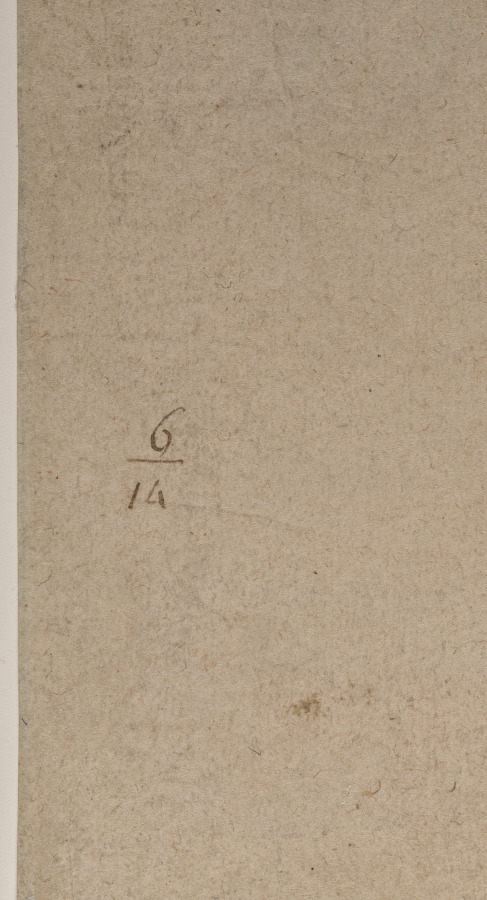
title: A Faun Grasping a Bunch of Grapes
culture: Flanders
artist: studio of Peter Paul Rubens (Flemish, 1577–1640)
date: after 1616–18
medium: black chalk and brush and brown wash; framing lines in pen and black ink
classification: Drawing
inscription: VERSO, upper right, in brown ink: no 40 ; lower left, in brown ink: 6/14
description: This drawing relates to a finished painting (now lost) by Peter Paul Rubens that depicted a faun (a woodland creature similar to a satyr) squeezing grapes into the mouth of a young Bacchus. That figure, shown here, could be Silenus, who educated Bacchus on the pleasures of wine, revelry, and nature. Rubens ran a large studio and employed numerous apprentices, one of whom may have made this copy after the original painting. As a form of instruction, Rubens added ink wash to the drawing to enhance the shading on the figure and shadows behind it.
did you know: Swirling draperies like the one haphazardly worn by this faun do more than conceal, in many cases they reveal an artist's technical skill. To render folds and gathers in fabric, artists used chiaroscuro, meaning contrasting light and dark tones.